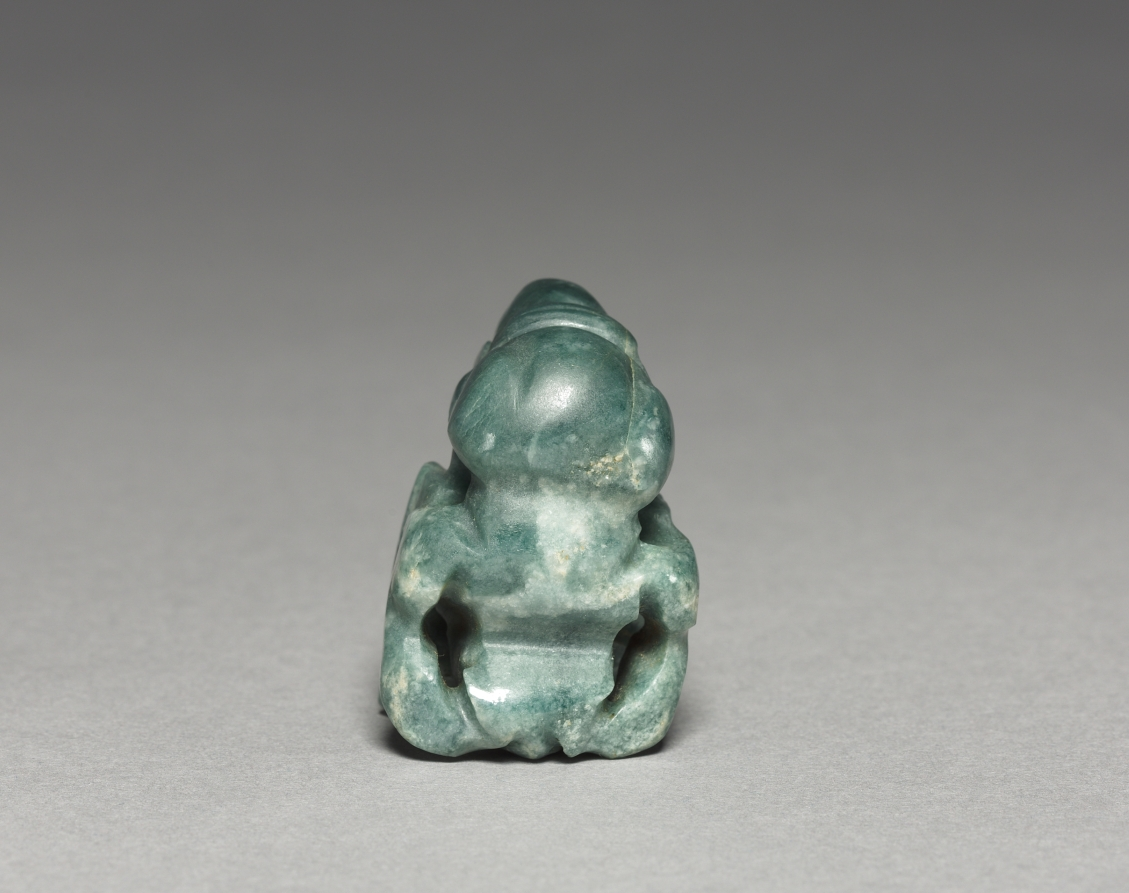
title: Bird Pendant (Buzzard or Vulture?)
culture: Costa Rica, Atlantic Watershed region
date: c. 300 BCE–600 CE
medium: jadeite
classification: Jewelry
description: Before about AD 500, when gold-working technologies were adopted in Costa Rica, jade was the quintessential luxury material and it was masterfully carved into exquisite ornaments of many kinds. Ancient Americans did not use many metal tools, and artists carved jade, a tough stone, with implements of stone, bone, bamboo, or reed.